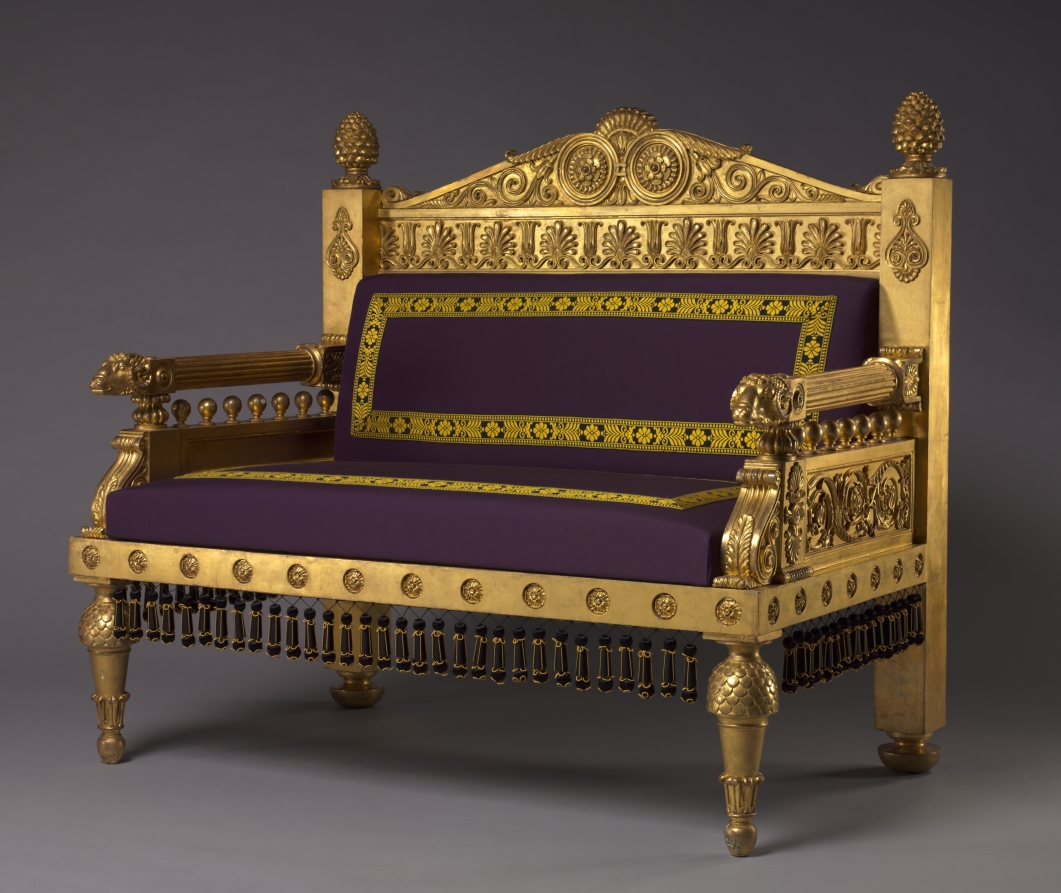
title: Settee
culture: England, 19th century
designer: Thomas Hope (British, 1769–1831)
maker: Unknown Maker (British)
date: c. 1802–07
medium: gilt-wood, reproduction wool upholstery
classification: Wood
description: An art collector, designer, and champion of neoclassicism, Thomas Hope designed this settee for display in his London house. Hope’s design exemplifies the continued interest in neoclassical ornament around 1800 through the use of elaborately carved friezes, a central pediment, and a lavishly gilded surface. In 1807 Hope published Household Furniture and Interior Decoration, featuring descriptions of his renowned collection of antiquities and the interior furnishings from his London house, including this settee. Many architects and cabinetmaking firms took inspiration from Hope’s designs, adapting Greek and Roman forms to create bold expressions of neoclassicism in their architecture and decoration.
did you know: The acorn finials, ram’s heads, and clusters of stylized honeysuckle flowers along the settee’s frame are typical of Thomas Hope’s neoclassical designs.